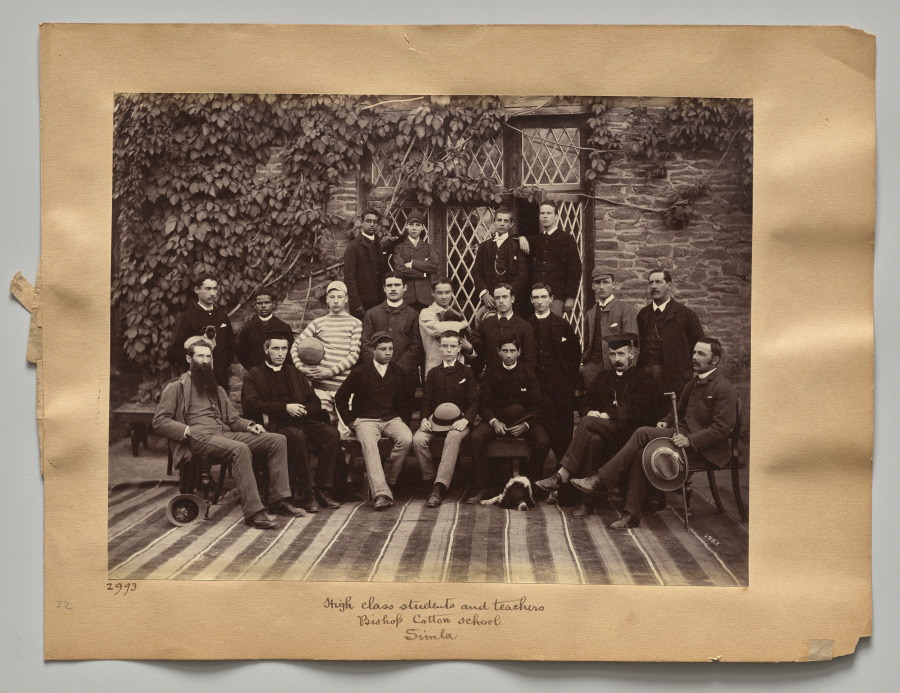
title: High Class Students and Teachers at Bishop Cotton School, Shimla (verso)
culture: India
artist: Raja Deen Dayal (Indian, 1844–1905)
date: c. 1882–87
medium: albumen print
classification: Photograph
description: These photographs are part of an album, now disassembled, of around 105 photographs taken in India between 1885 and summer 1887 that provide glimpses into the lives of the British colonial elite and royal and upper-class Indians. The museum holds another group of 37 pictures from this album (2016.266), which was probably commissioned by a British civil servant visiting or working in India around 1888 as a personal souvenir of his experiences there.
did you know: Raja Deen Dayal is regarded now, and was considered during his lifetime, to be India’s most important 19th-century photographer.